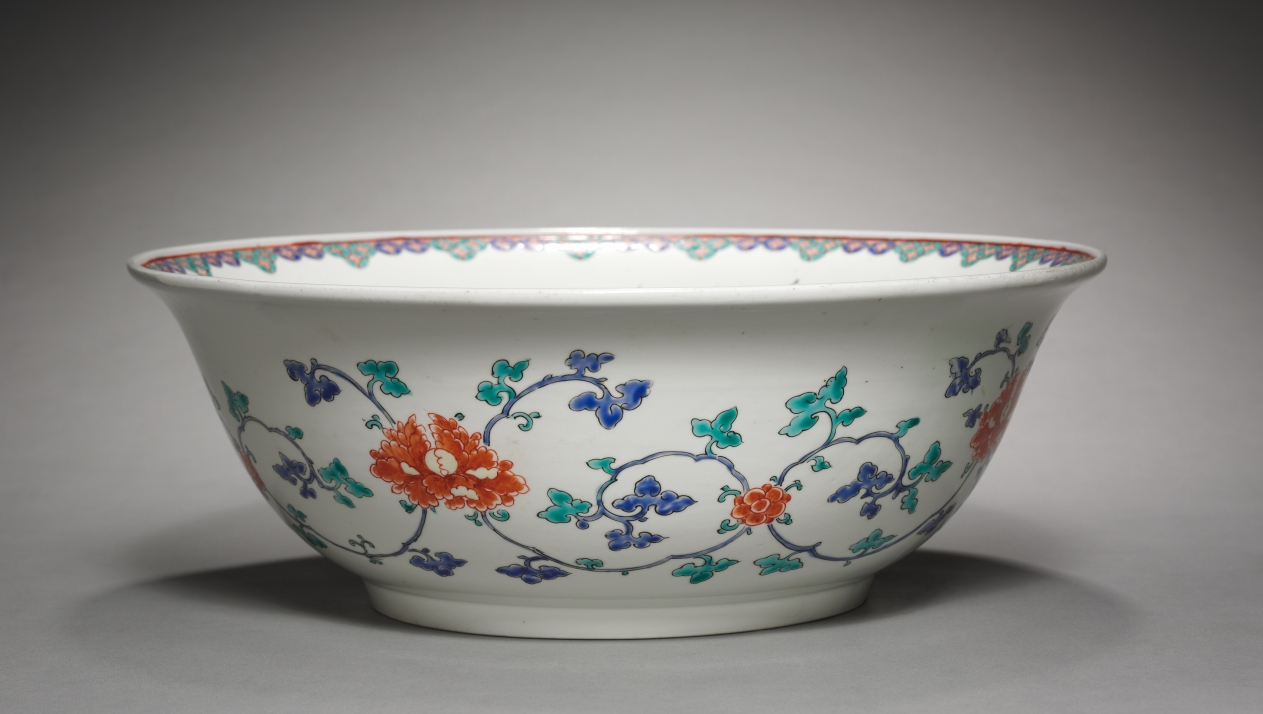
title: Bowl: Kakiemon Ware (2 of 2)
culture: Japan, Edo period (1615–1868)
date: late 1600s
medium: porcelain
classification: Ceramic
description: The Chinese style of decoration identifies this bowl as a product made for the markets in England, Holland, France, and Germany. Here, kakiemon potters rearranged the Chinese literati motifs of the plum, pine, and bamboo. Such kakiemon ware inspired domestic porcelain production in Europe in the 18th and 19th centuries.